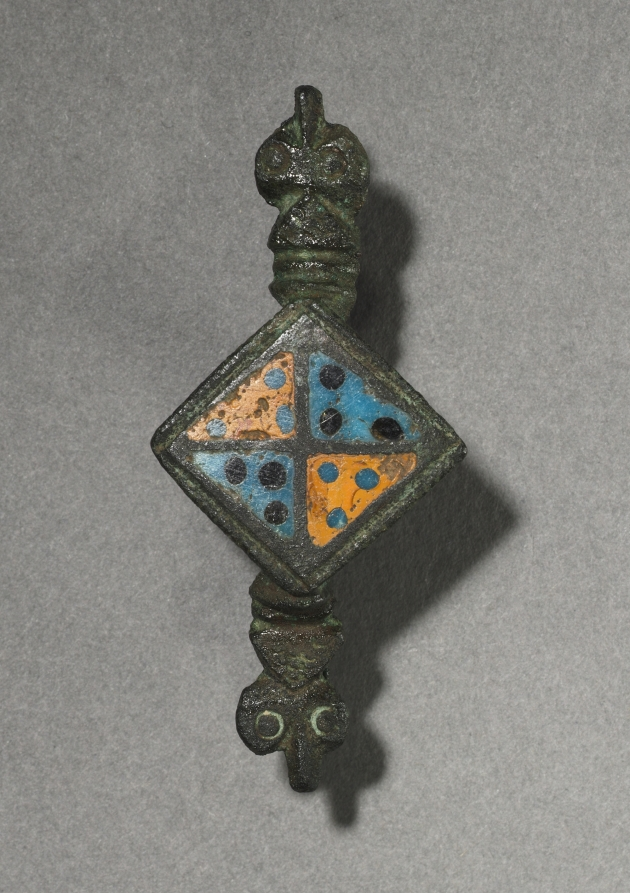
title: Ornamental Brooch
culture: Gallo-Roman or Romano-British, Migration period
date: c. 100–300 CE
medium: bronze and champlevé enamel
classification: Jewelry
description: These brooches functioned as garment clasps (much like the generally larger fibulae) and are distinctive for their decorative enamels. The art of enameling was highly popular among the conquered peoples who lived on the outskirts of the Roman empire, chiefly the Celts and the Gauls. Though the enameling technique was practiced by the Romans themselves on small objects, the brightly colored decoration readily appealed to "barbarian" taste. By the AD 200s, enameled brooches like these were being made in abundance by the native peoples of Britain and Gaul (modern France and Belgium).